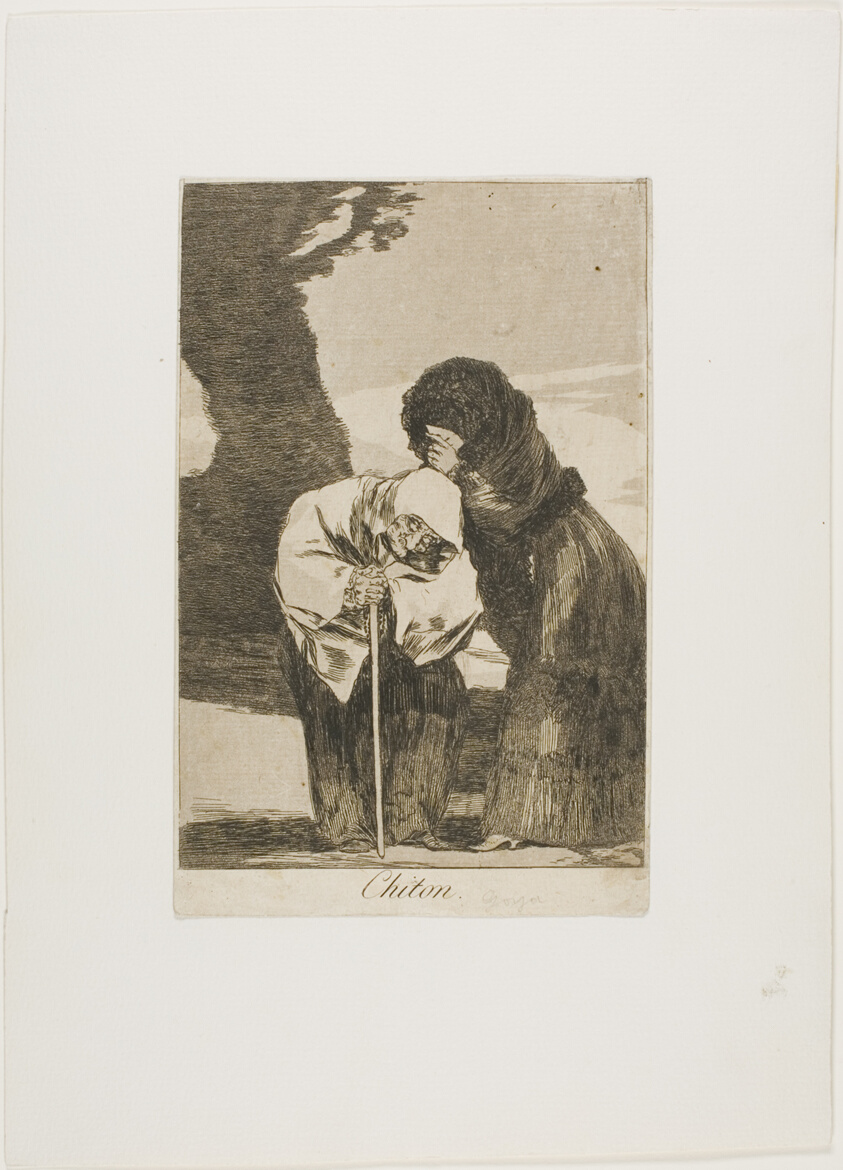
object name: Print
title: Hush, plate 28 from Los Caprichos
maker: Francisco José de Goya y Lucientes (Spanish, 1746-1828)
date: 1797/99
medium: Etching, aquatint and burin on ivory laid paper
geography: Spain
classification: etching; print; prints and drawing